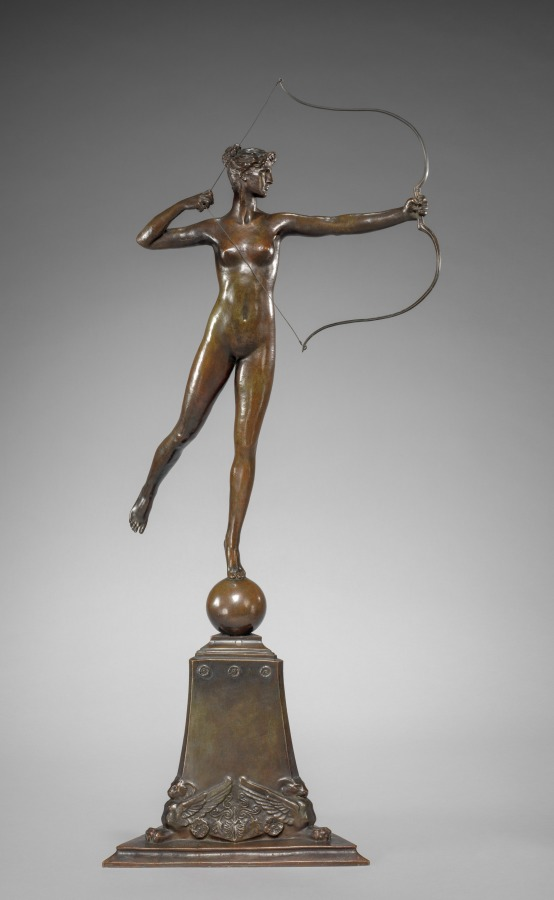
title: Diana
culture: America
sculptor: Augustus Saint-Gaudens (American, born Ireland, 1848–1907)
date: modeled 1899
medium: bronze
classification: Sculpture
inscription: Signed and dated on base: AUGUSTUS SAINT GAUDENS, MDCCCXCIX; inscribed on triangular base: DIANA OF THE TOWER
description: Depicting the Roman goddess of the hunt, Diana is a small version of the massive weathervane Augustus Saint-Gaudens designed for the second iteration of Madison Square Garden in New York, a building that was demolished in 1925. Although controversial for its nudity, the weathervane dominated the city's skyline and became a prominent landmark. Due to its popularity, Saint-Gaudens marketed tabletop versions of the sculpture, which were sold through high-end retailers such as Tiffany and Co.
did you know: The face of Diana was inspired by Davida Johnson Clark, the artist's longtime model, muse, and lover.